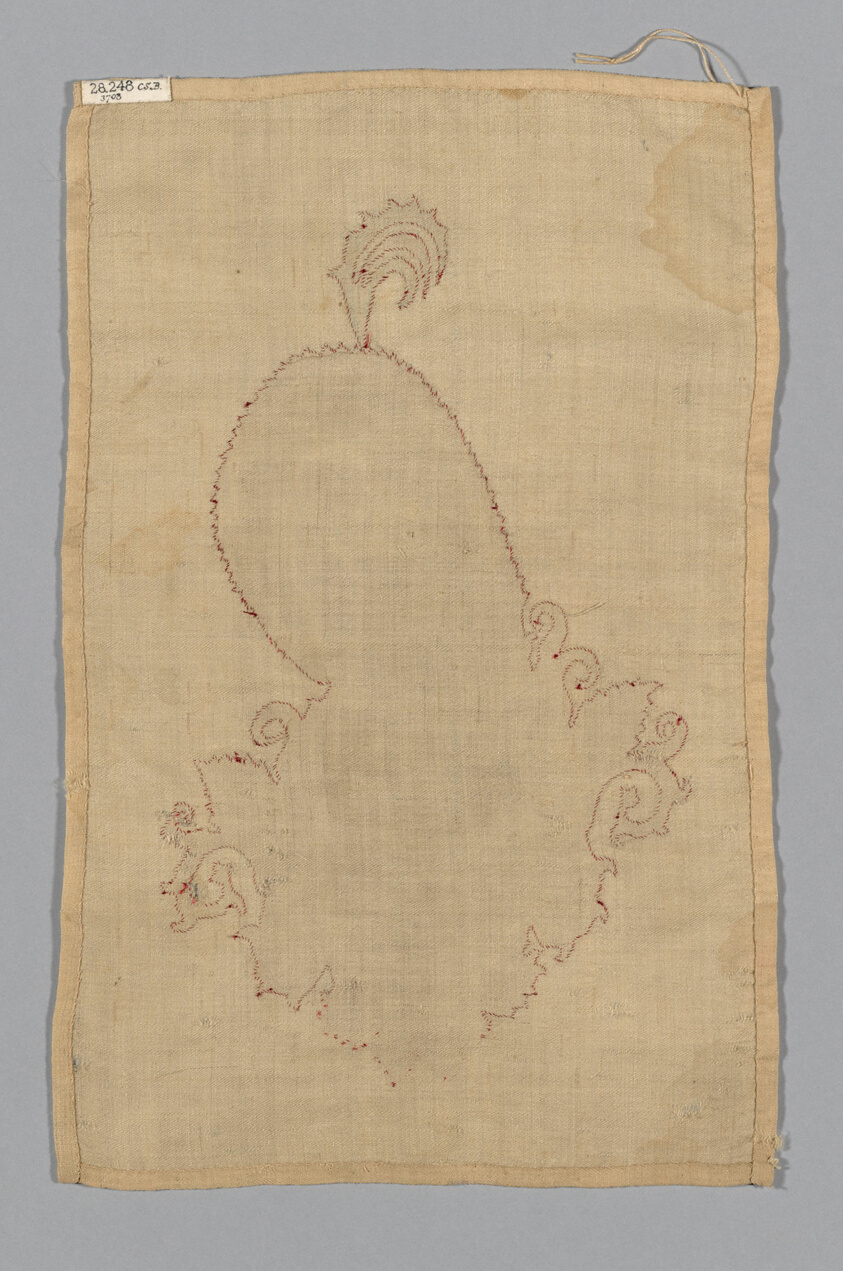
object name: Textile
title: Shawl Fragment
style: 19th century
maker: India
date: 1870s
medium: Wool, embroidery on twill weave foundation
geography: India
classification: weaving; textile; fragment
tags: paisley, design